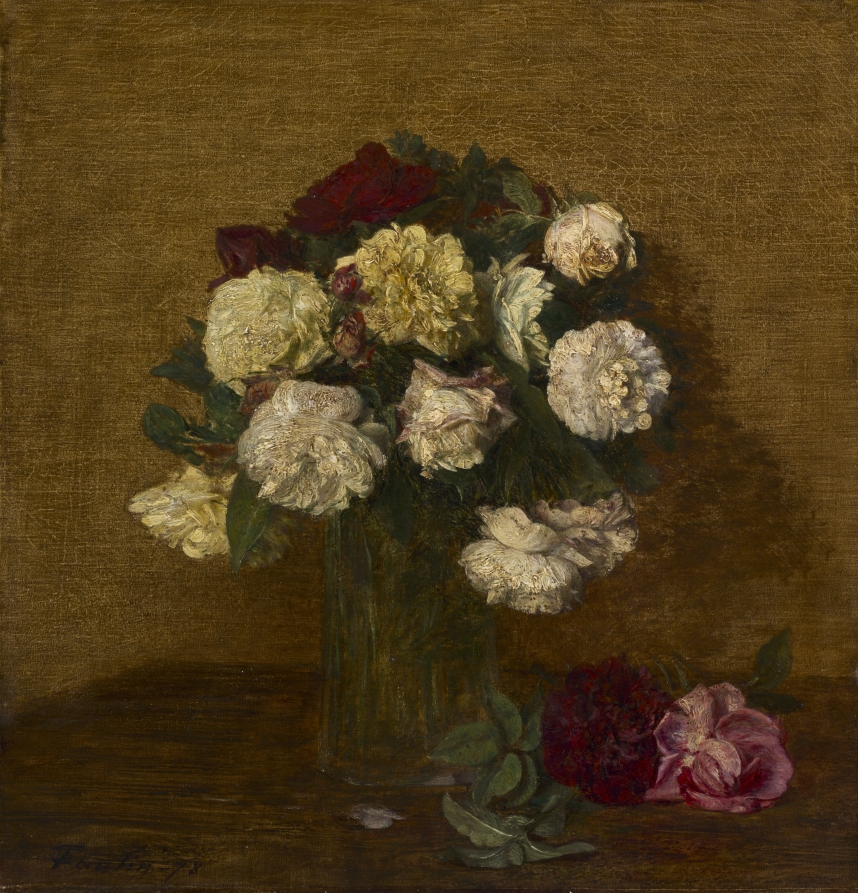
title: Roses in a Vase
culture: France, 19th century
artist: Henri Fantin-Latour (French, 1836–1904)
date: 1878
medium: oil on fabric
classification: Painting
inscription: Signed lower left: Fantin-78